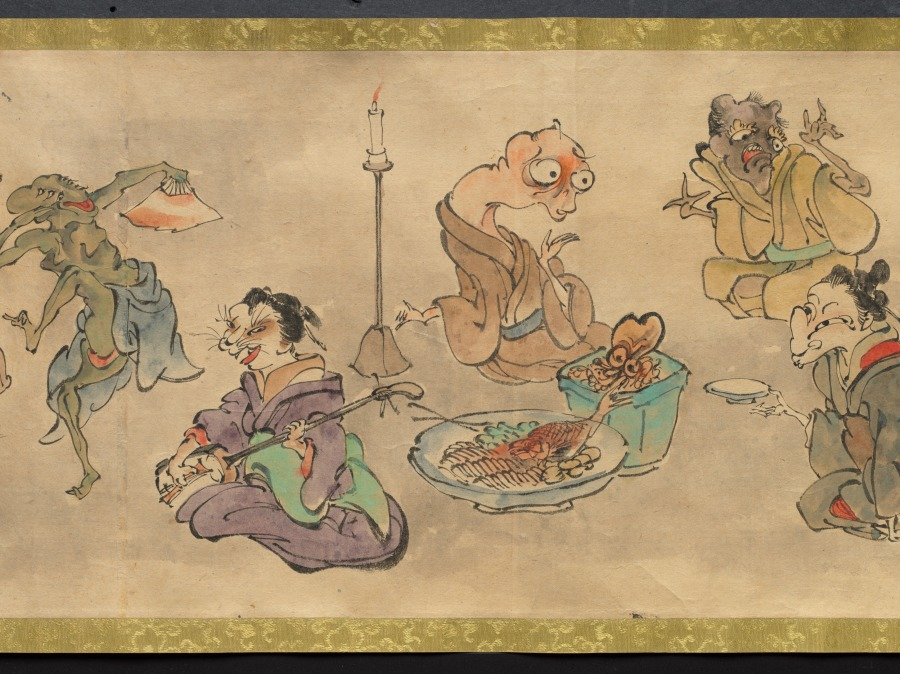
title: An Illustrated Marriage of Apparitions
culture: Japan, Edo period (1615–1868)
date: mid-1800s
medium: handscroll; ink and color on paper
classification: Painting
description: The matchmaking, engagement, wedding, and birth of the first child of two apparitions, or bakemono, literally "things that change," are illustrated in this whimsical, humorous handscroll. Japanese folklore abounds with such strange creatures, most famously represented in handscrolls featuring a procession of 100 supernatural monsters. Aside from a textual preface and cartouches indicating the content of the scenes, the tale is told visually. The artist and whereabouts of the original handscroll are unknown, but a number of other 19th-century copies by amateur painters exist in Japanese collections, attesting to its broad appeal.